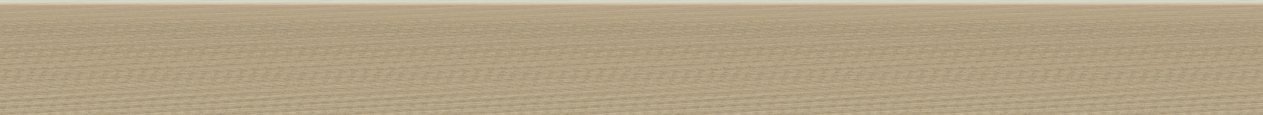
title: Purification at the Orchid Pavilion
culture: China, Qing dynasty (1644-1911)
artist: Fan Yi (Chinese, c. 1615–before 1688)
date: 1671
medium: Handscroll; ink and color on silk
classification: Painting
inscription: Artist's inscription, signature, and 2 seals: Painted by Fan Yi of Zhongfu during the second month of winter of the xinhai year [1671]. [2 seals] Fan Yi zhi yin, Zi yu yi.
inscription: Title on the frontispiece by Monk Yueshan (1629-1709).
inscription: 3 colophons and 13 additional seals: 1 colophon, dated 1707, and 6 seals of Yueshan; 2 colophons and 3 seals of Wong Kwan-Shut (Huang Junshi) 黃君實 (b. 1934); 2 seals of Fu Shen 傅 申 (b. 1937); 2 seals of Tessai Tomioka 富岡鐵齋 (1836-1924).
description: By the 1600s, the historic gathering at Lanting, Zhejiang province, in 353 CE was a common theme in Chinese painting. Originally based on a composition attributed to Li Gonglin (1049– 1106), now lost, Wu school artists revived the theme. Fan Yi, the brother of the artist Fan Qi from Nanjing, used delicate brushwork and luminous colors to depict the spring gathering.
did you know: The gathering’s host is in the Orchid Pavilion at the end of the scroll, representing an episode known as “Wang Xizhi Watching the Geese 王羲之觀鵝圖.”